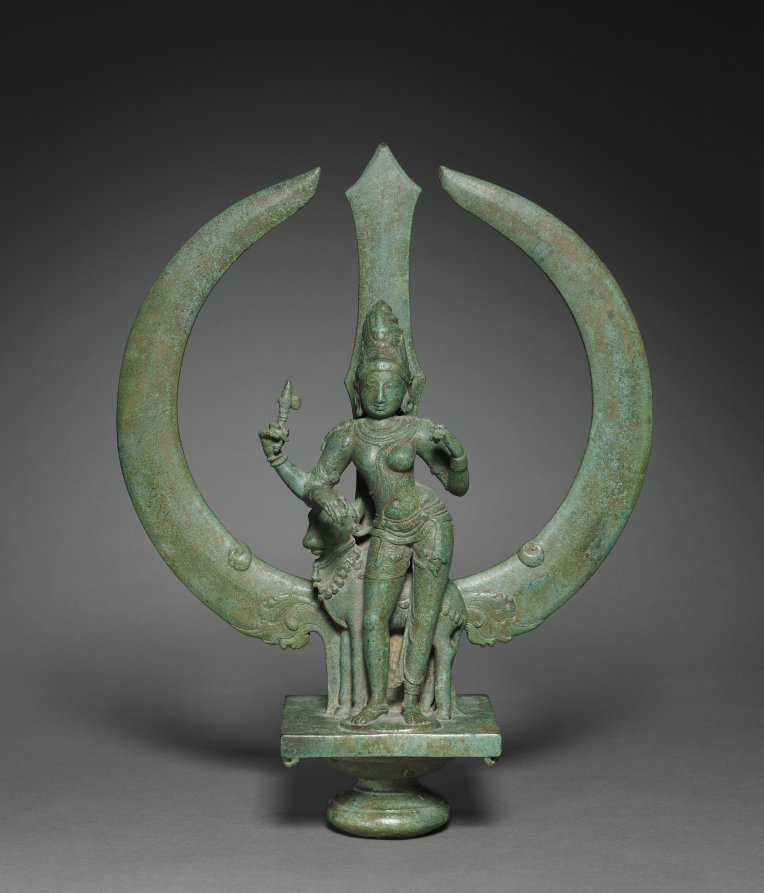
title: Trident with Shiva as Half-Woman (Ardhanarishvara)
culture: South India, Tamil Nadu, Chola period (900-13th Century)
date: c. 1050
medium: bronze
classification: Sculpture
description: The form of the trident—the main weapon of the Hindu god Shiva—dramatically and elegantly encircles his form in which the left side is female and the right side is male. The male side has the matted locks of a yogi piled high on his head; he holds an ax and leans on his mount, the bull. The female side has a jeweled crown, earring, full breast, broad hips, long skirt, and only one arm. The lower hands probably held a stringed instrument. This particular iconic form of Shiva visually indicates that he embodies all phenomena, even if they seem contradictory. He is male and female, destructive and creative, yogi and royal sovereign, hunter and musician.